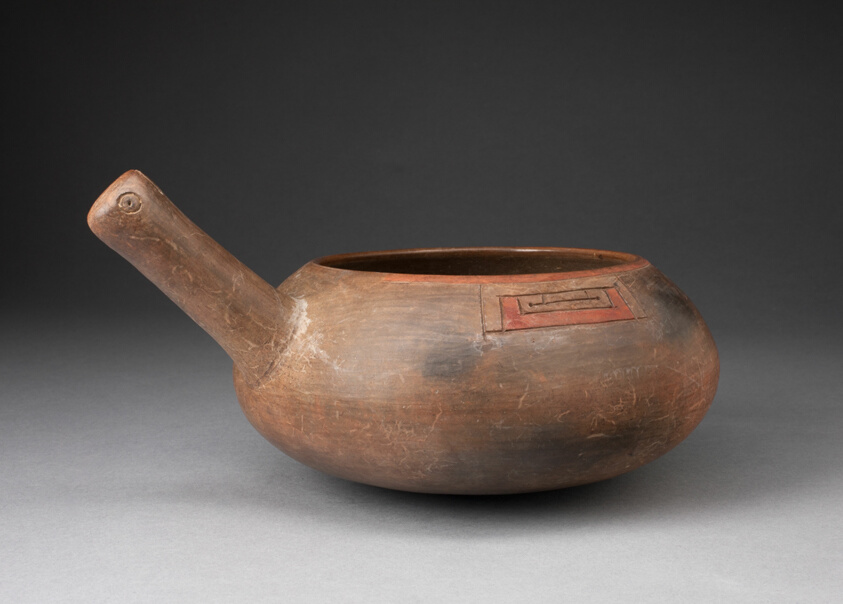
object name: Vessel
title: Corn Popper with Incised Geometric Motif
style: paracas, Arts of the Americas, andean, andes, south american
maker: Paracas (Ica Valley, south coast, Peru)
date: 650–150 BCE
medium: Ceramic and pigment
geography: Peru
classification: earthenware; art of the americas; ceramics; vessel